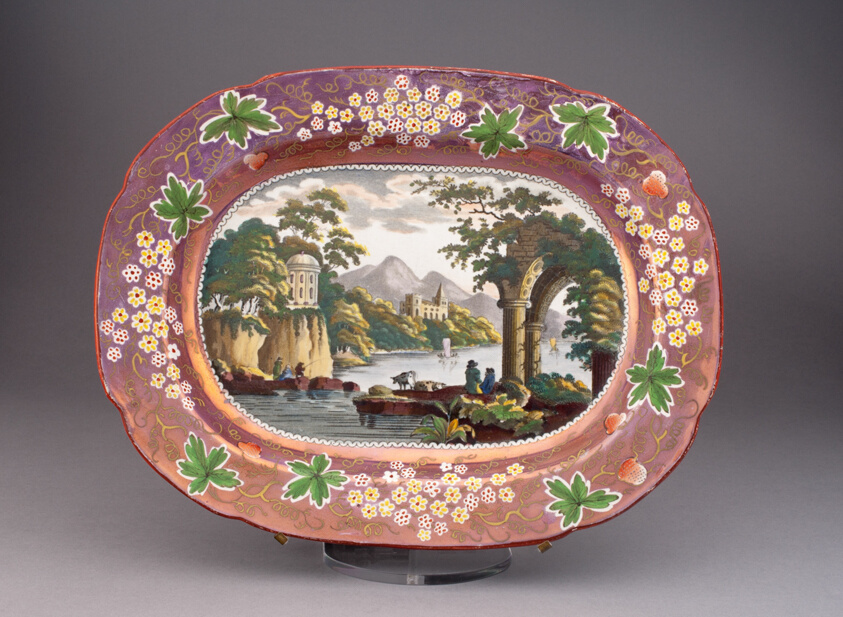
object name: Ceramics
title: Platter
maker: England, Staffordshire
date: 1820/30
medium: Earthenware with purple lustre decoration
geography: Staffordshire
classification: vessel for serving food; earthenware; dish (vessel); european decorative arts; ceramics